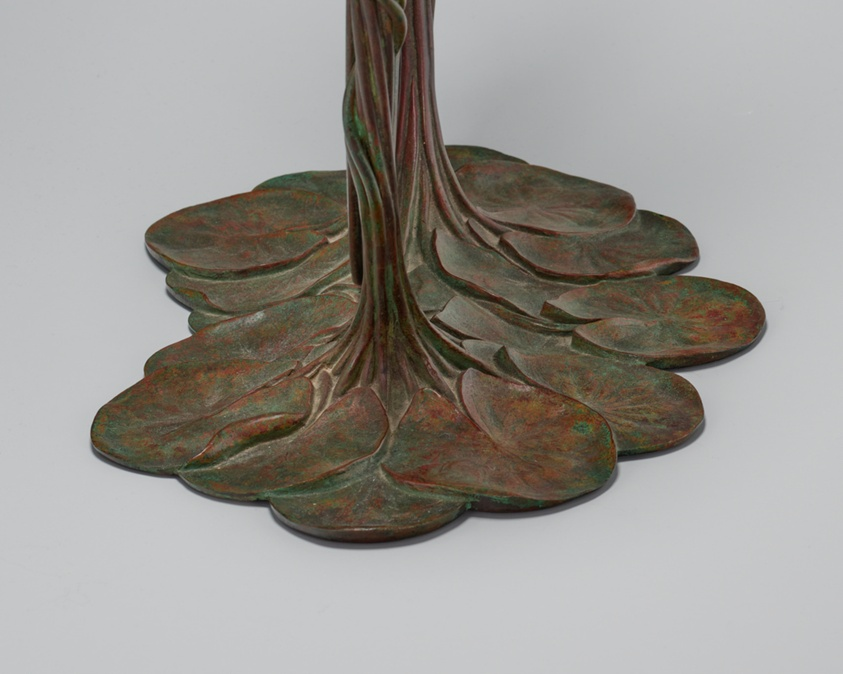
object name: Furnishings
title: “Pond Lily” Mirror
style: Arts and Crafts Movement, 20th Century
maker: Tiffany Studios (American, 1902–32); Corona, New York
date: c. 1905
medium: Bronze and mirrored glass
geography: Corona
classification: dresser mirror; american decorative arts; decorative arts; flat mirrors; mirror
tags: Nymphaea, pond lily, pond, water lilies